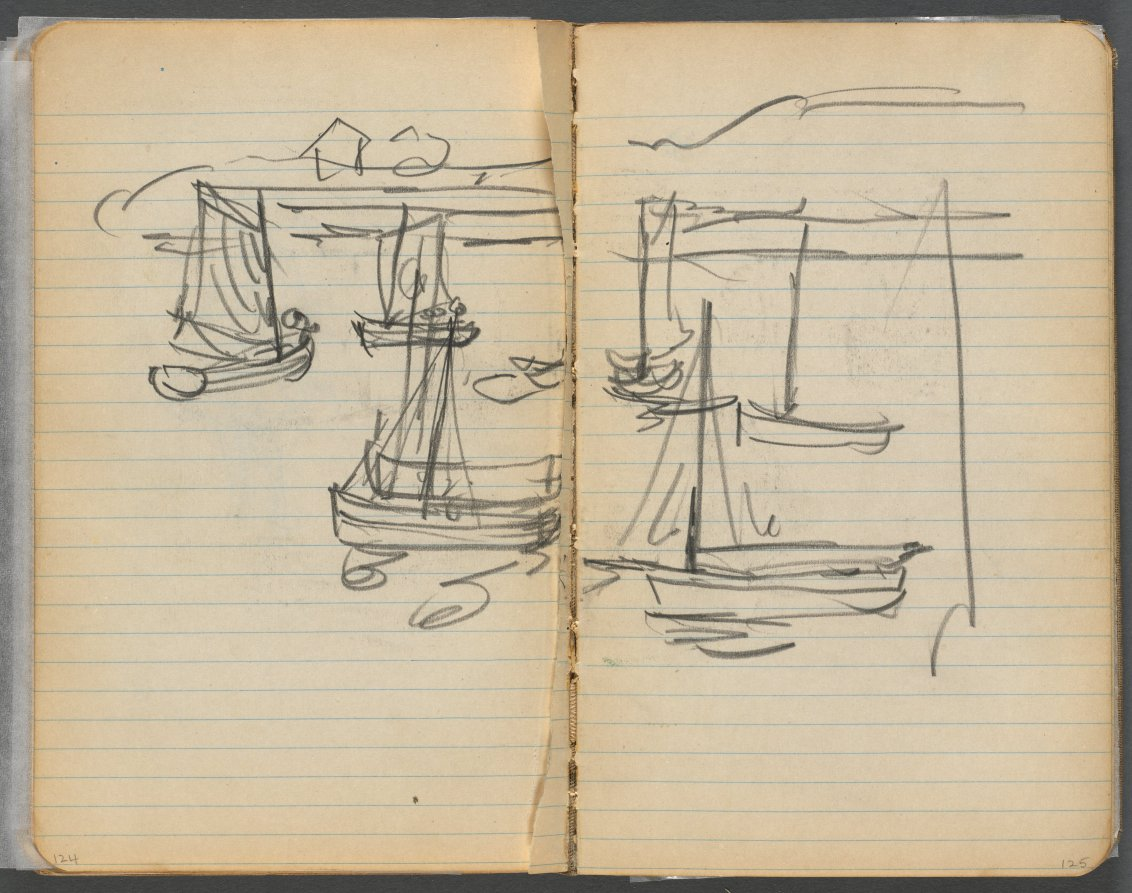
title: Sketchbook, page 124 & 125: Sailboats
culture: America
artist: Maurice Prendergast (American, born Newfoundland [now Canada], 1858–1924)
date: 1905–10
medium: graphite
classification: Bound Volume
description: This sketchbook contains 69 pages of drawings, a diary largely devoted to the state of the artist's health, and a three-page discourse on the nature of genius and ideas.